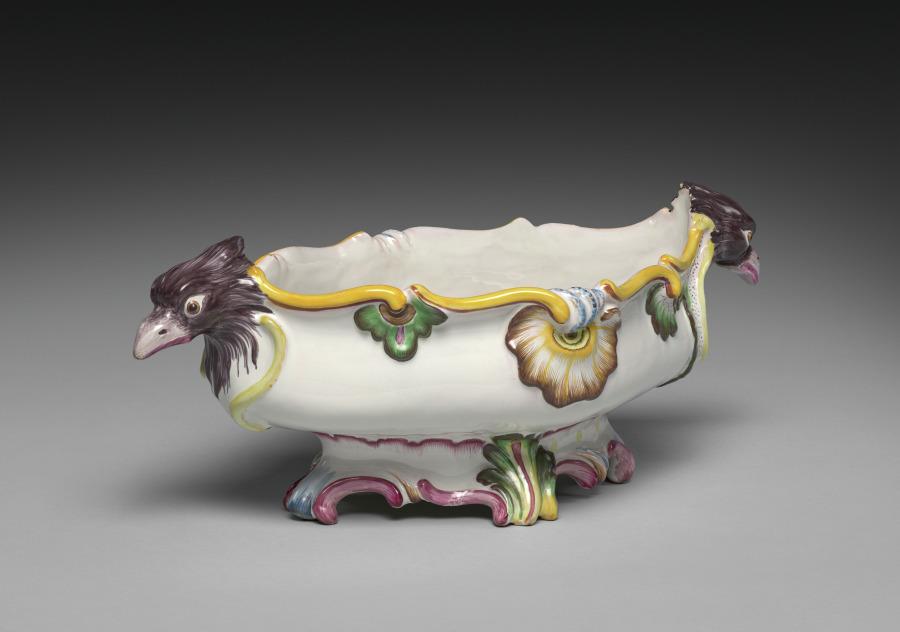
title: Tureen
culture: France, Strasbourg, 18th century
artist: Strasbourg Factory (France)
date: c. 1750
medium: tin-glazed earthenware (faience) with enamel decoration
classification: Ceramic